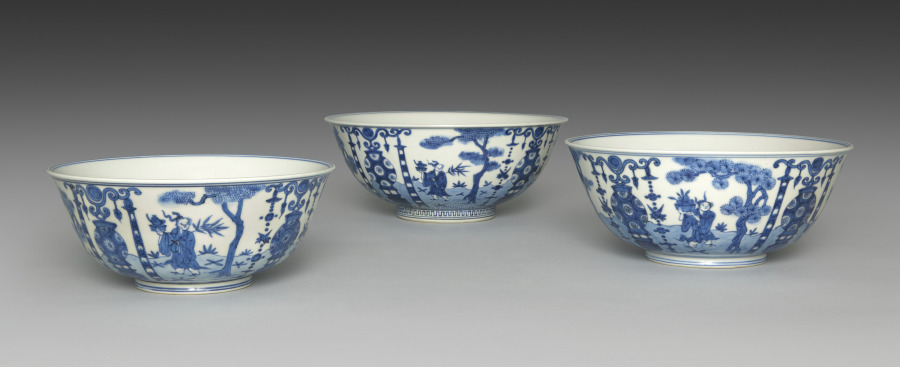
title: Nesting Bowls with Daoist Immortals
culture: Japan, Meiji period (1868–1912)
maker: Seifū Yohei III (Japanese, 1851–1914)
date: 1893–1914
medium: Set of three bowls; porcelain with underglaze blue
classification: Ceramic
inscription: 清風与平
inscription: 大日本清風造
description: Yohei III was capable of ink painting–like compositions in underglaze blue, as well as more decorative ones like that on this set of three nesting bowls. Bowls with very similar designs in five colors were produced in the reign of the Wanli emperor (r. 1572–1620) during the Ming dynasty, and Yohei must have had direct access to one of these or to a close copy. A scene of Daoist immortals is presented on the bowls. On each one, the ground plane is defined with a blue wash. Four lanterns are evenly spaced around the bowl. Two are flanked with linked-piece metalwork banners of the seven treasures. The alternate altars are adorned with textile banners. In between them are four immortals, each standing beneath a tree with small plants surrounding his feet. Two of the immortals hold fruit on a tray. Another carries an elixir-filled ewer and a willow branch. The fourth holds a swastika (manji), here an auspicious symbol, and a flower. Curiously, the inscription inside each footring reads “Made by Seifu of Great Japan,” in emulation of the dynasty and reign inscriptions that appear on Chinese ceramics; however, one can also see through the translucent glaze another inscription, “Seifu Yohei,” written in large characters within a double band of blue on the largest bowl.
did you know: In the bottom of each bowl is a scene of two robed immortals who appear to stand on a precipice in a mountainous landscape high in the clouds, with celestial orbs over their heads.